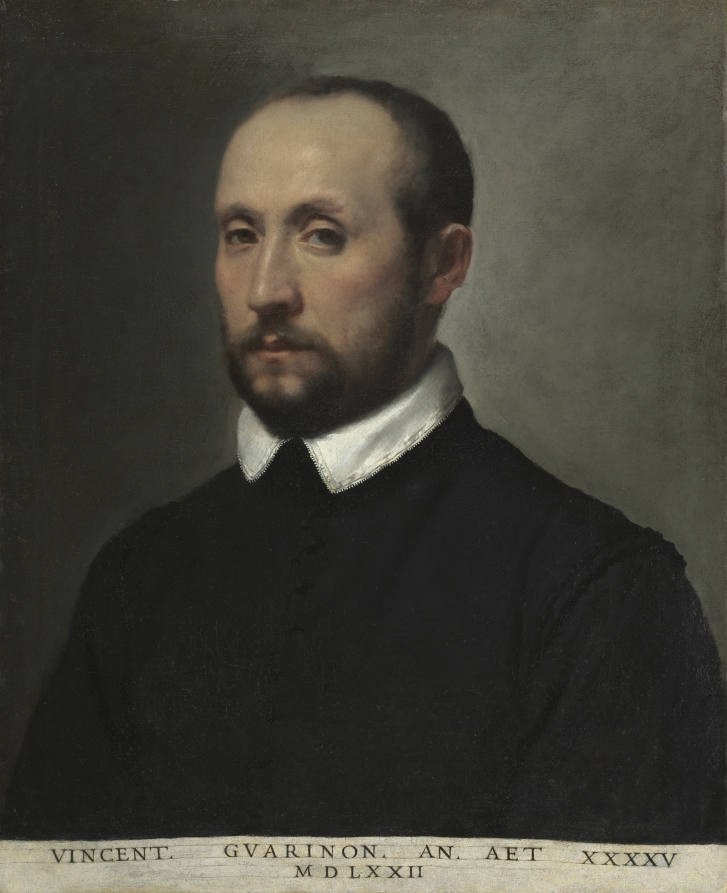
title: Portrait of Vincenzo Guarignoni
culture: Italy, Bergamo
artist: Giovanni Battista Moroni (Italian, 1525–1578)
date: c. 1572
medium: oil on canvas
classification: Painting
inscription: Inscribed at bottom: "VINCENT. GVARINON. AN. AET. XXXXV / MDLXXII"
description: The Latin inscription gives the sitter's name and age (45), as well as the painting's date. Guarignoni came from a prominent family in the northern Italian city of Bergamo. His direct and thoughtful gaze enhances the painting’s lifelike quality, while the solemn detachment conveys dignity and excellence rather than an exact personality, a common approach in Renaissance portraiture.